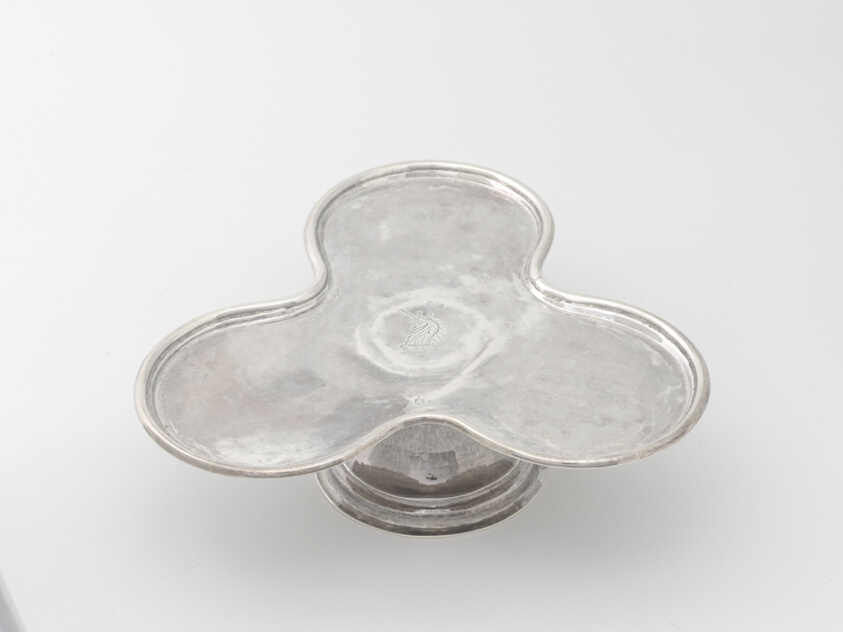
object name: Metalwork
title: Salver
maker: Edward Winslow; American, 1669–1753; Boston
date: c. 1715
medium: Silver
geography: Boston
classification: vessel for serving food; silver; american decorative arts; american arts; decorative arts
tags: dining, drinking